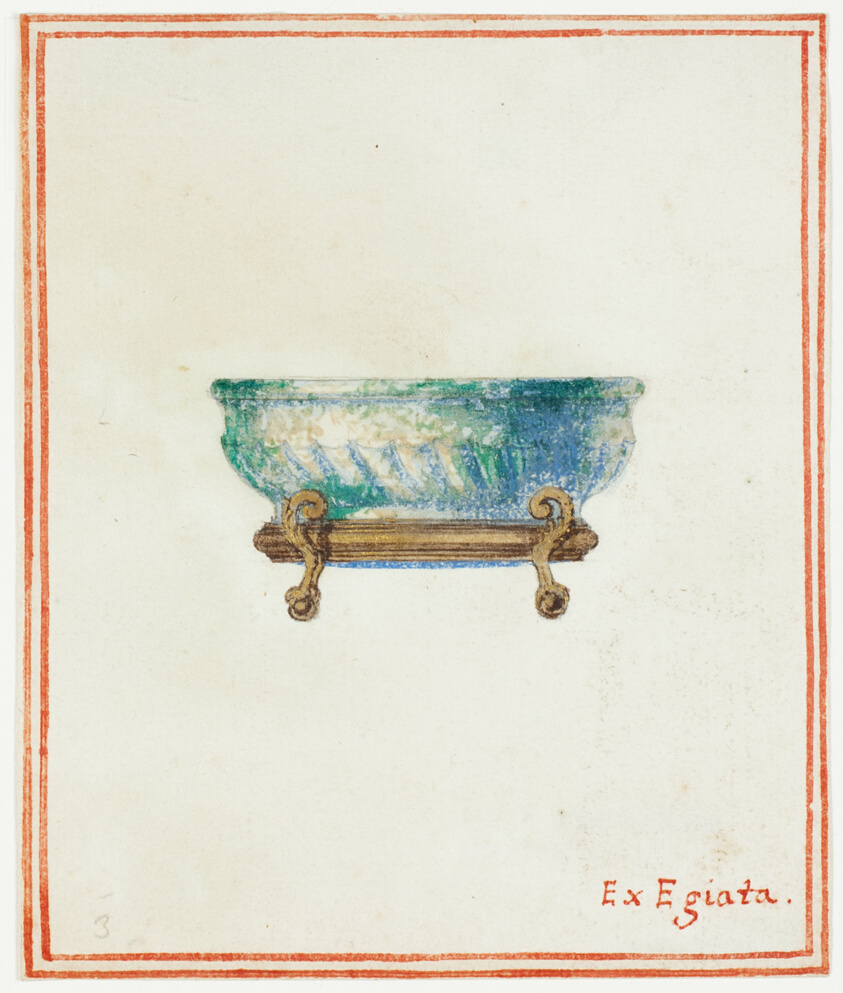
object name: Drawing and Watercolor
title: Ex Egiata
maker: Giuseppe Grisoni (Italian, born Flanders, 1699-1769)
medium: Gouache, heightened with touches of gold paint, over traces of black chalk, on ivory laid paper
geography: Flanders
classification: gouache; watercolor; drawings (visual works); prints and drawing